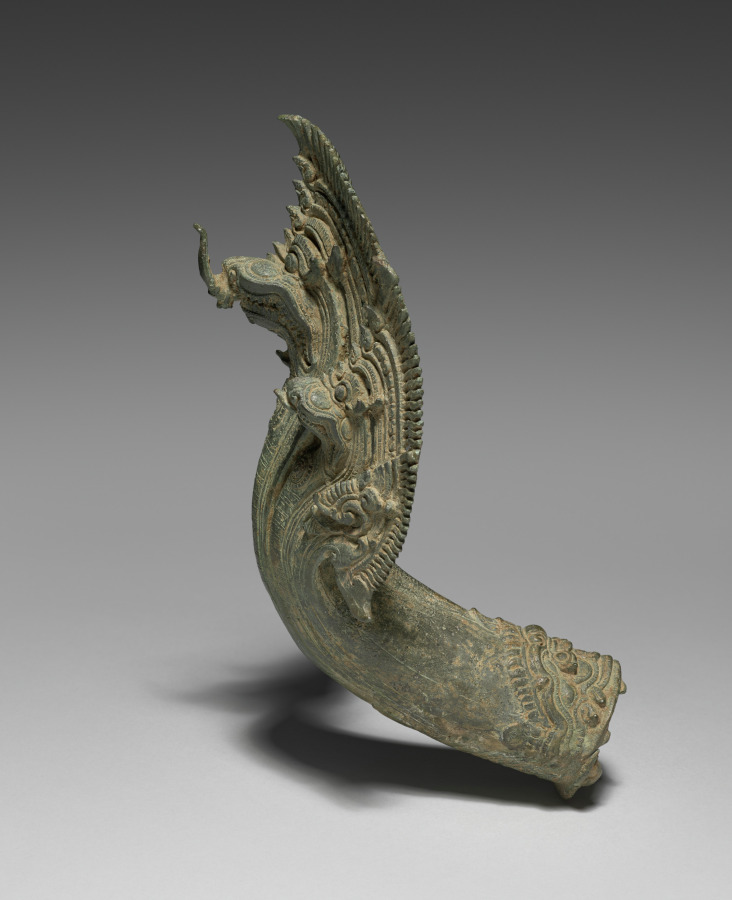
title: Naga Finial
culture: Cambodia, Angkor Wat Period, 12th century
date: 1100s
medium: bronze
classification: Metalwork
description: When members of the royal family or priesthood traveled in a public festival procession or to a temple to make offerings or participate in a ceremony, they would be carried in a palanquin, or a covered litter. Portable objects of veneration, such as bronze images or a sacred fire, were also carried on palanquins. The palanquins had wooden poles, hanging seats or raised platforms, and bronze fittings cast in intricate forms and gilt, lending the palanquins a sumptuous quality. The royal palanquins were typically fitted with multiheaded, serpent-shaped finials at the ends of the poles and corners of the elevated platforms. Naga means serpent in Sanskrit, a language from India selectively appropriated by the Khmer in Cambodia. In their own indigenous mythology, the Khmer people trace their descent from a naga princess and a prince from the island of Java who journeyed to Cambodia. The naga remains a potent emblem for the Khmer nation to this day; it is ubiquitous on Cambodian monuments.